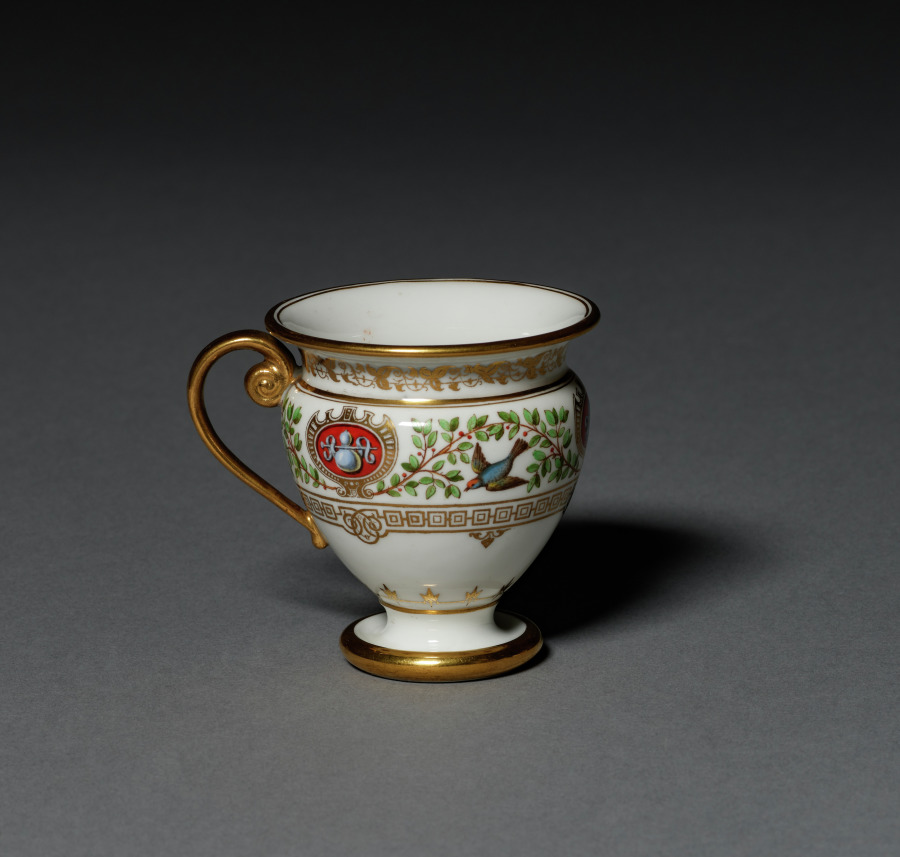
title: Cup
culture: France, Sèvres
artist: Sèvres Porcelain Factory (French, est. 1756)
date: 1839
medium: hard-paste porcelain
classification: Ceramic